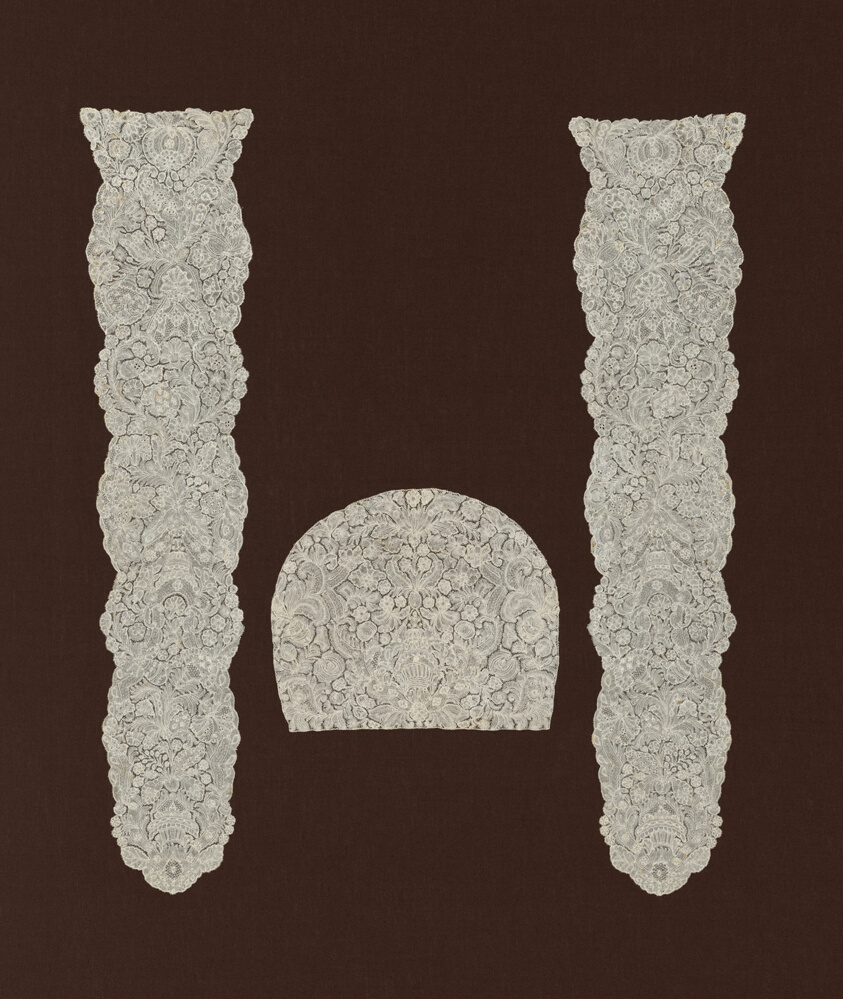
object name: Costume and Accessories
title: Cap Crown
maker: Flanders, Brussels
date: 1730s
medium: Linen, bobbin part lace of a type known as "Brussels" [with a twisted bar ground?]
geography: Brussels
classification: costume accessory; lace - bobbin; textile; costume; costume accessory - headdress; costume accessory worn above the waist